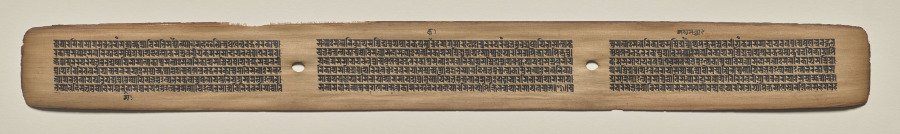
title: Text, Folio 151 (recto), from a Manuscript of the Perfection of Wisdom in Eight Thousand Lines (Ashtasahasrika Prajnaparamita-sutra)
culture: Eastern India, Bihar, Vikramashila Monastery. Painting: Nepal, Kathmandu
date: Sunday, September 14, 1119 (year 239 of the Newar Samvat in the month of Ashvina)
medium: gum tempera and ink on palm leaves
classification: Painting